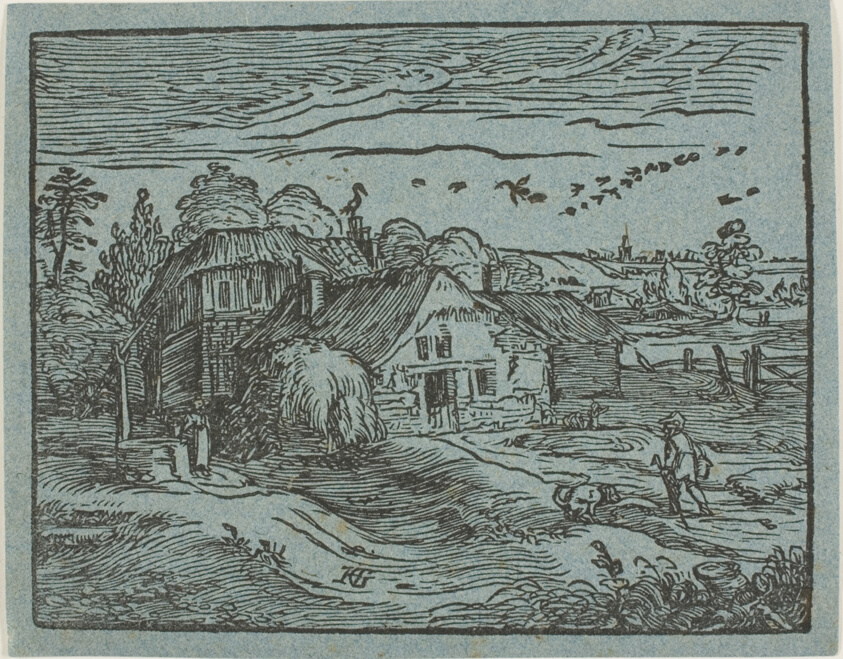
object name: Print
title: Landscape with a Farmhouse, from Four Small Landscapes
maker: Hendrick Goltzius (Dutch, 1558-1617)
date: 1597/1600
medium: Woodcut in black on blue laid paper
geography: Netherlands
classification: woodcut; print; prints and drawing